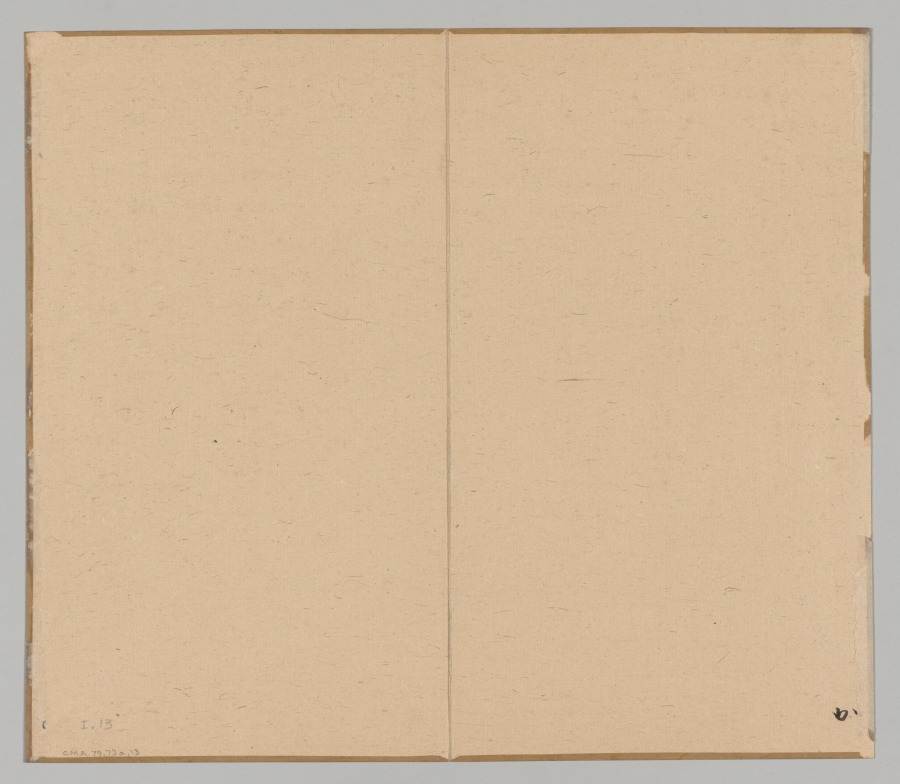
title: Reverberations of Taiga, Volume 1 (leaf 13)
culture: Japan, Edo period (1615–1868)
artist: Aoki Shukuya (Japanese, d. 1802)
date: mid- to late 1700s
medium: double-leaf from a pair of albums; ink and light color on paper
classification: Portfolio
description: Traditionally, young painters in Japan began their studies with an established master-painter. The master's compositions invariably became models that the apprentice copied to learn various ink and brush techniques. Shukuya was a pupil of the famous Kyoto artist Ikeno Taiga, whose style is reflected in these sketches of rocks, trees, and mountains.